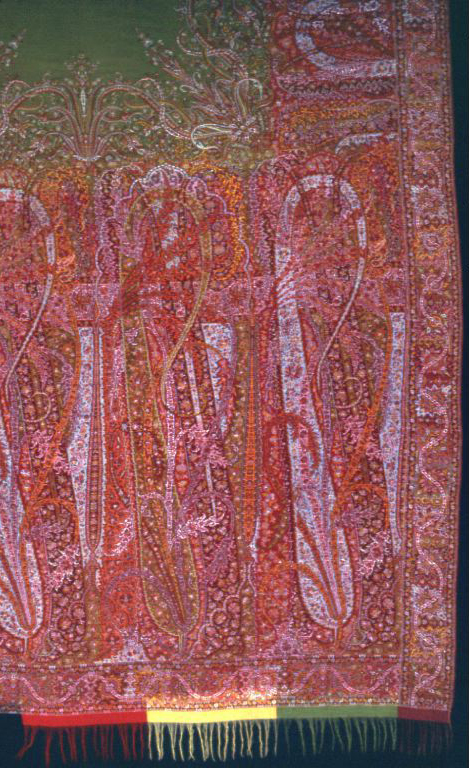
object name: Textile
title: Long Shawl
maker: Europe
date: 1840/45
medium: Wool, silk and cotton, warp threads dyed in multiple colors prior to weaving; center of weft-float faced 1:3 'S' twill weave; patterned areas of warp-float faced 3:1 'S' twill weave with patterning wefts bound in weft-float faced 1:3 'S' twill interlacings; "Harlequin" tabs of twill weave; knotted warp fringe; woven on loom with Jacquard attachment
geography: Europe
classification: textile; weaving